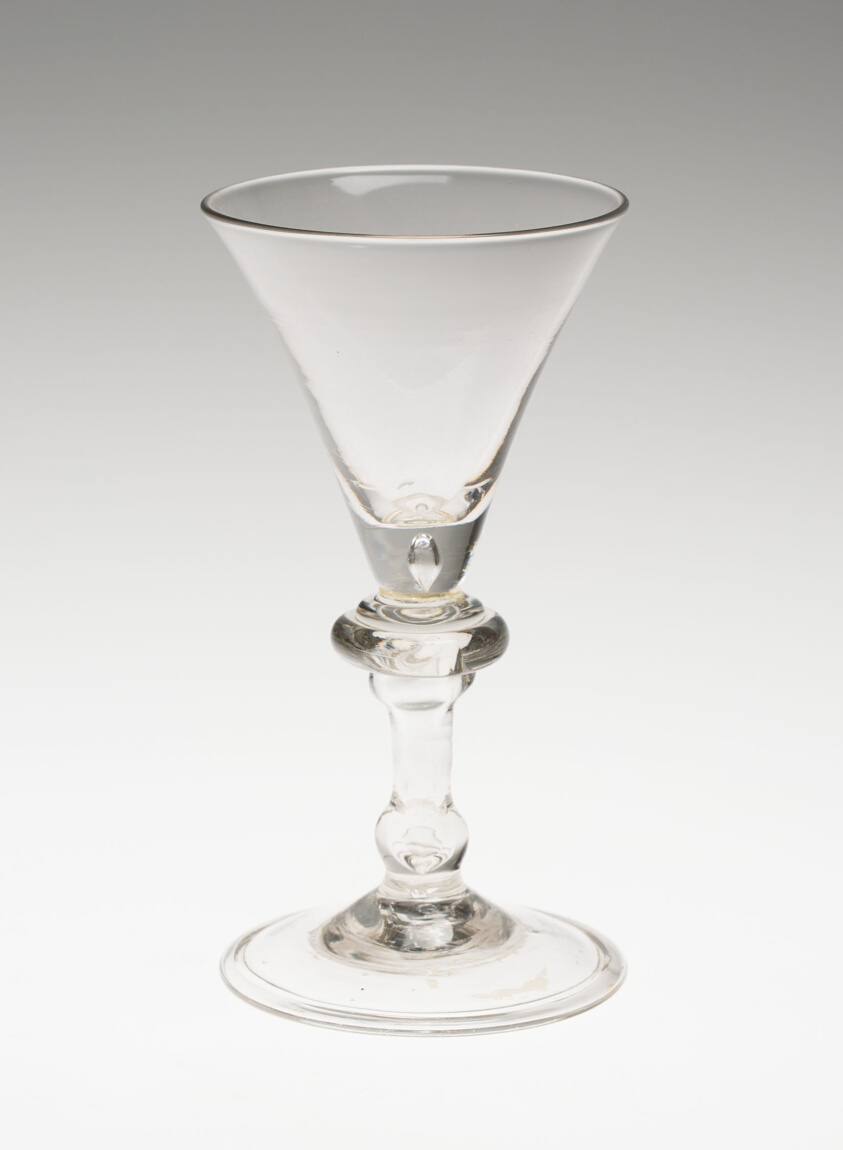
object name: Glass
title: Wine Glass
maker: England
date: c. 1720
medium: Glass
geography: England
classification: drinking vessel; glass